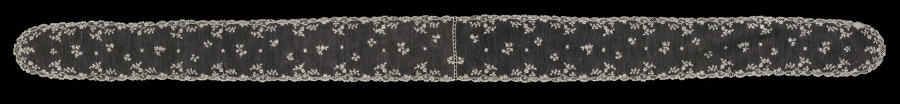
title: Pair of Lace Lappets, joined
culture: France, Alençon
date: 1774–92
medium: Linen: needle lace (Point d'Alençon)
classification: Lace